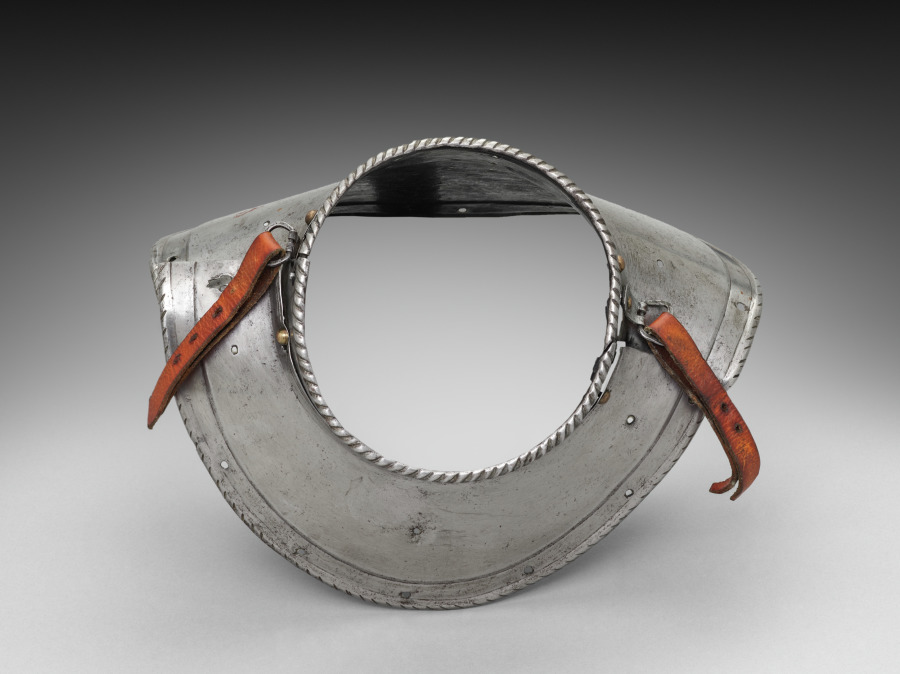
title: Colletin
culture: Germany, 19th century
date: 1801–1900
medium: steel with black paint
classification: Arms and Armor